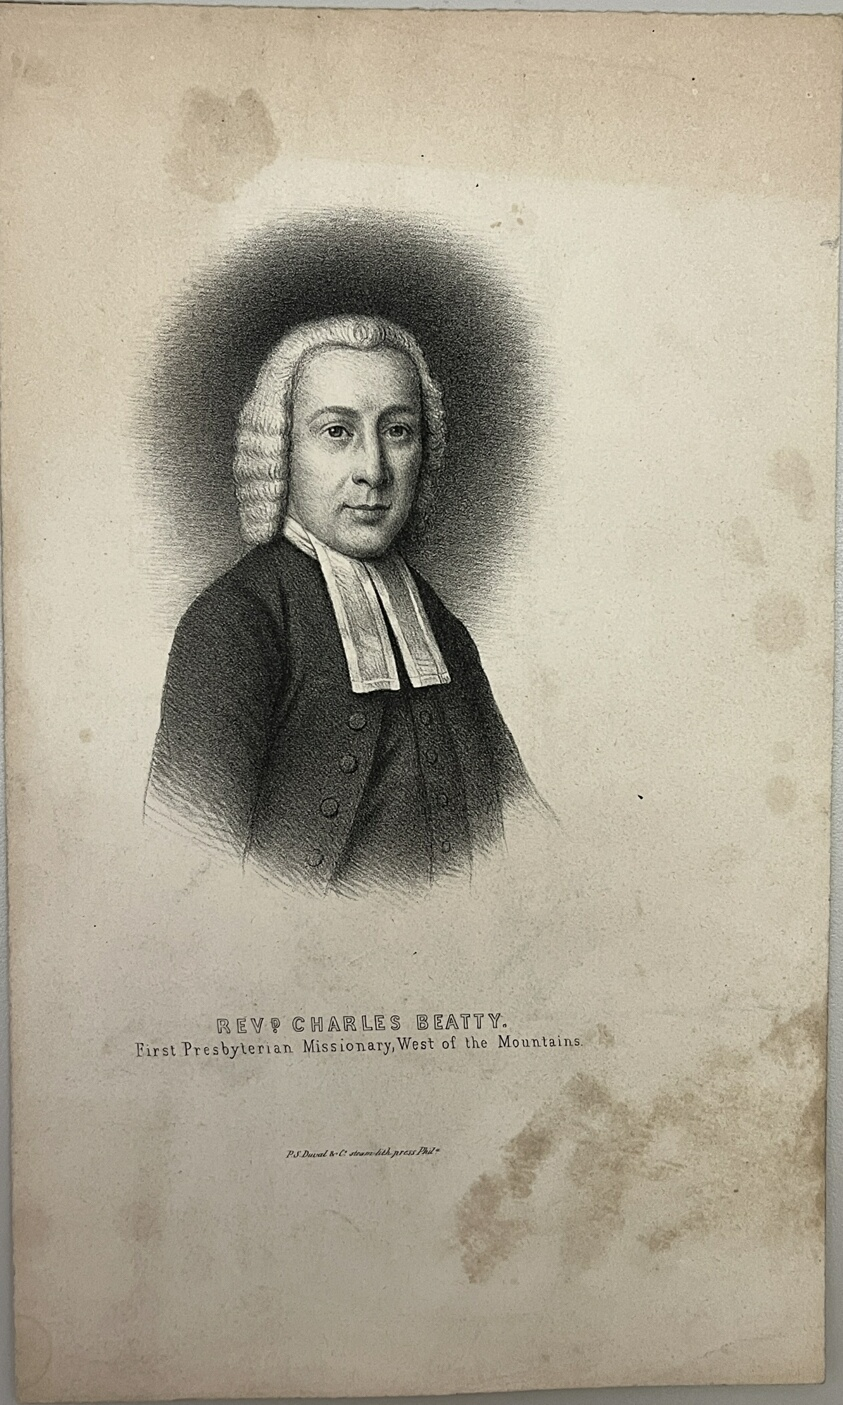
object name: Print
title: Reverend Charles Beatty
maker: Artist Unknown (Likely American, 19th century); Printed by P.S. Duval and Co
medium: Lithography on paper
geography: United States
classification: reproduction; print; prints and drawing